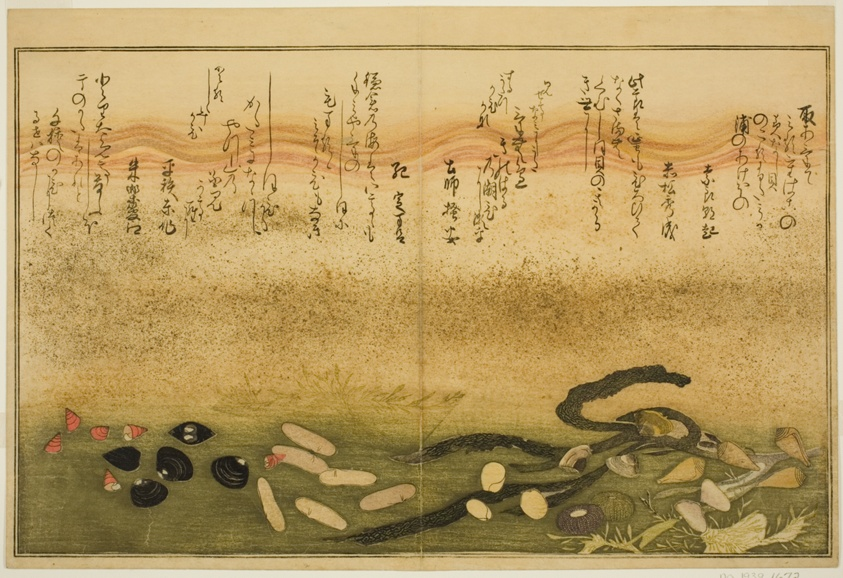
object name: Print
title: Minashi-gai, shio-gai, katatsu-gai, miso-gai, chijimi-gai, and chigusa-gai, from the illustrated book "Gifts from the Ebb Tide (Shiohi no tsuto)"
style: Japanese (culture or style)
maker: Kitagawa Utamaro 喜多川 歌麿; Japanese, 1753 (?)-1806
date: 1789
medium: Color woodblock print; double-page illustration from book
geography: Japan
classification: woodblock print; print; asian art